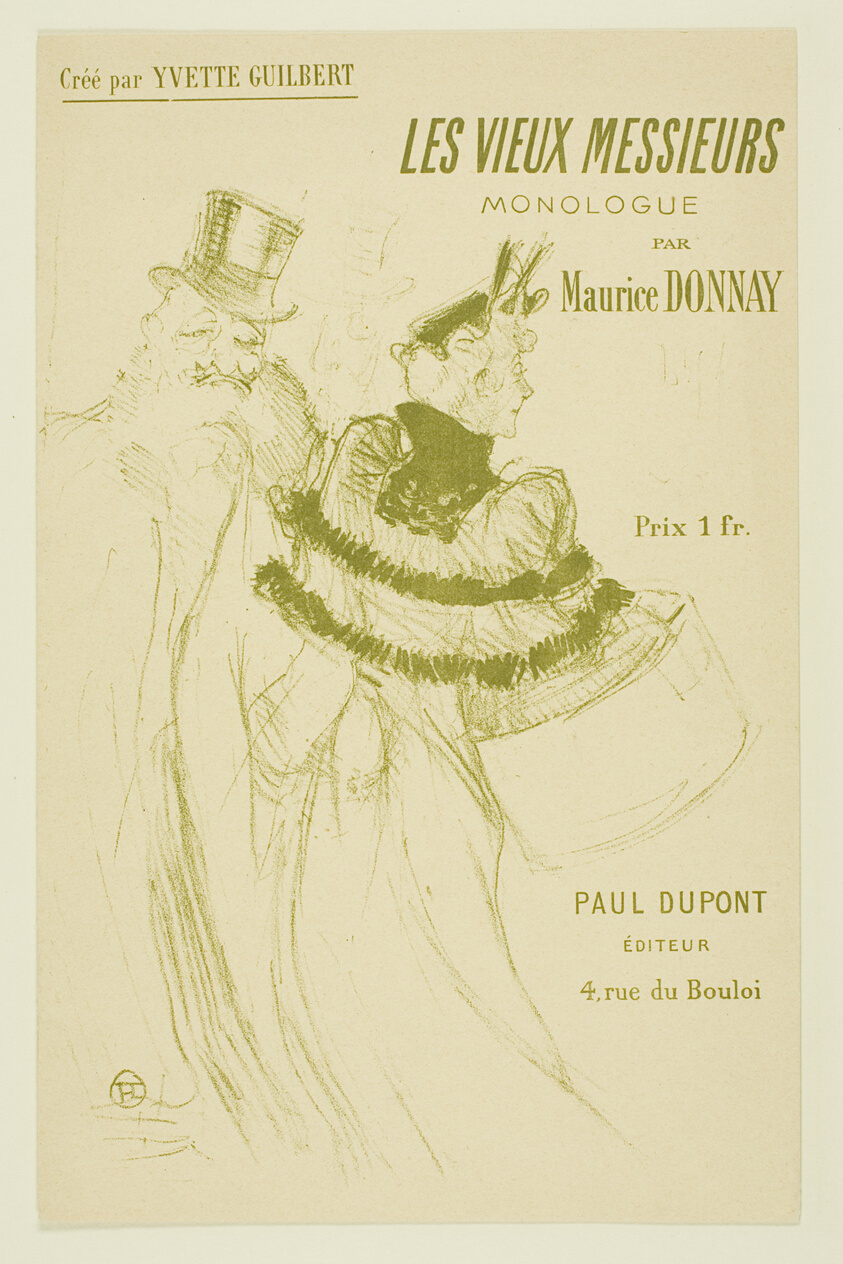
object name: Print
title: The Old Gentlemen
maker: Henri de Toulouse-Lautrec (French, 1864-1901)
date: 1894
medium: Color lithograph on cream wove paper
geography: France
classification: lithograph; print; prints and drawing